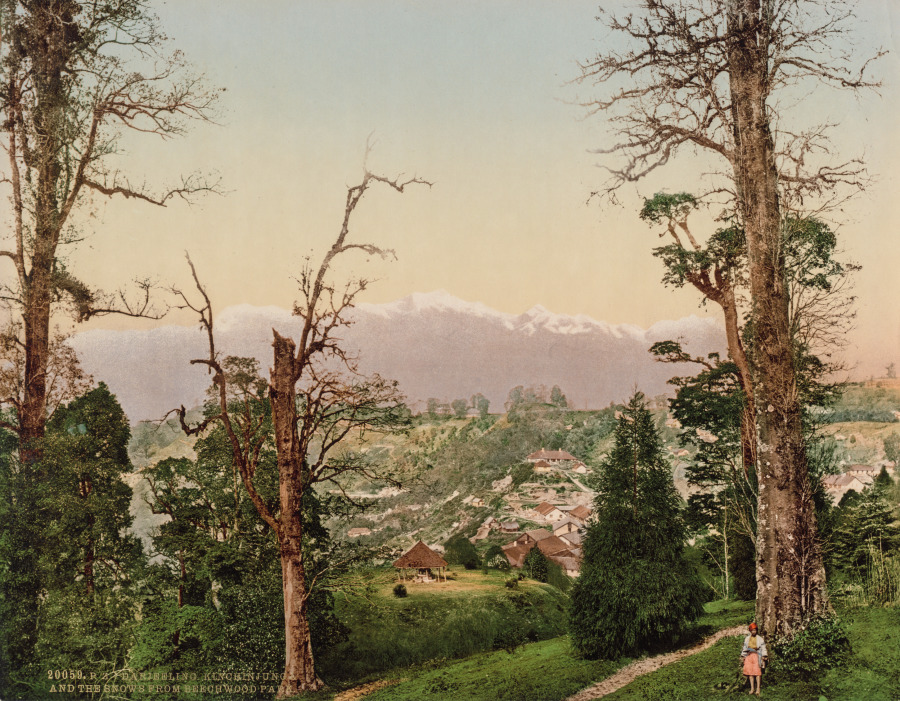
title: Darjeeling. Kinchinjunga and the Snows from Beechwood Park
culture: India, 19th century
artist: Photoglob Co. (Zurich, active c. 1890–1910)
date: 1890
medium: Photochrom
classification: Photograph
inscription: Imprinted in gold on recto in lower left corner: “20059. P.Z-DARJEELING. KINCHINJUNGA/AND THE SNOWS FROM BEECHWOOD PARK”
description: This view looks down at the town of Darjeeling, established in the early 1800s by the British colonial administration at 6,900 feet above sea level and across the foothills at Kinchinjunga, the third highest mountain in the world, which rises to more than 28,000 feet.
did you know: The composition evokes traditions in European landscape painting, not surprising since the photograph was made by Europeans for sale to Europeans and Americans.